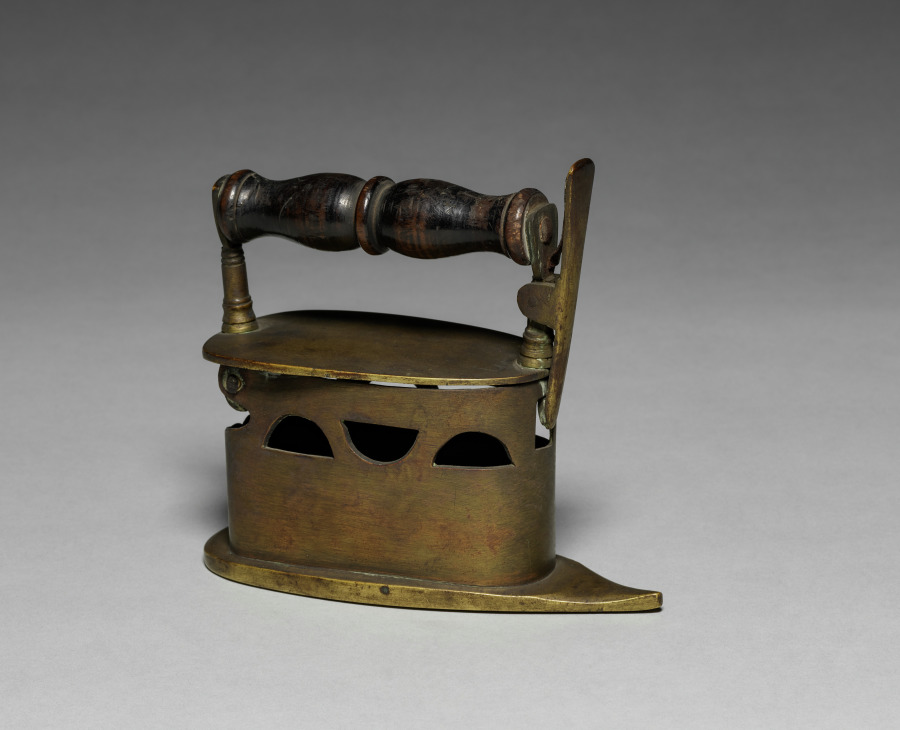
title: Pressing Iron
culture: Europe, 18th century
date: 1700s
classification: Tool